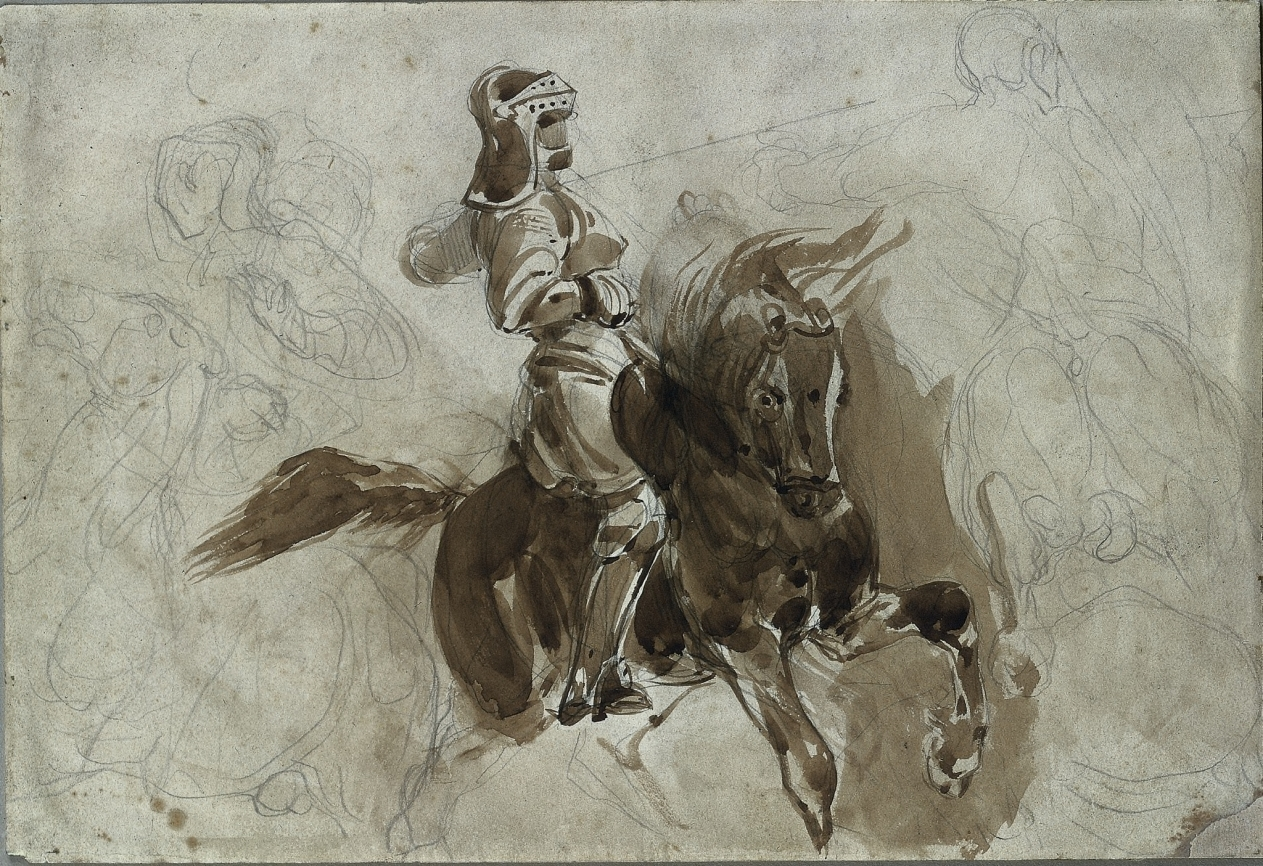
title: Armored Figure on Horseback (recto)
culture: France, 19th century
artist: Eugène Delacroix (French, 1798–1863)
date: c. 1828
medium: graphite and brush and brown wash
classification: Drawing